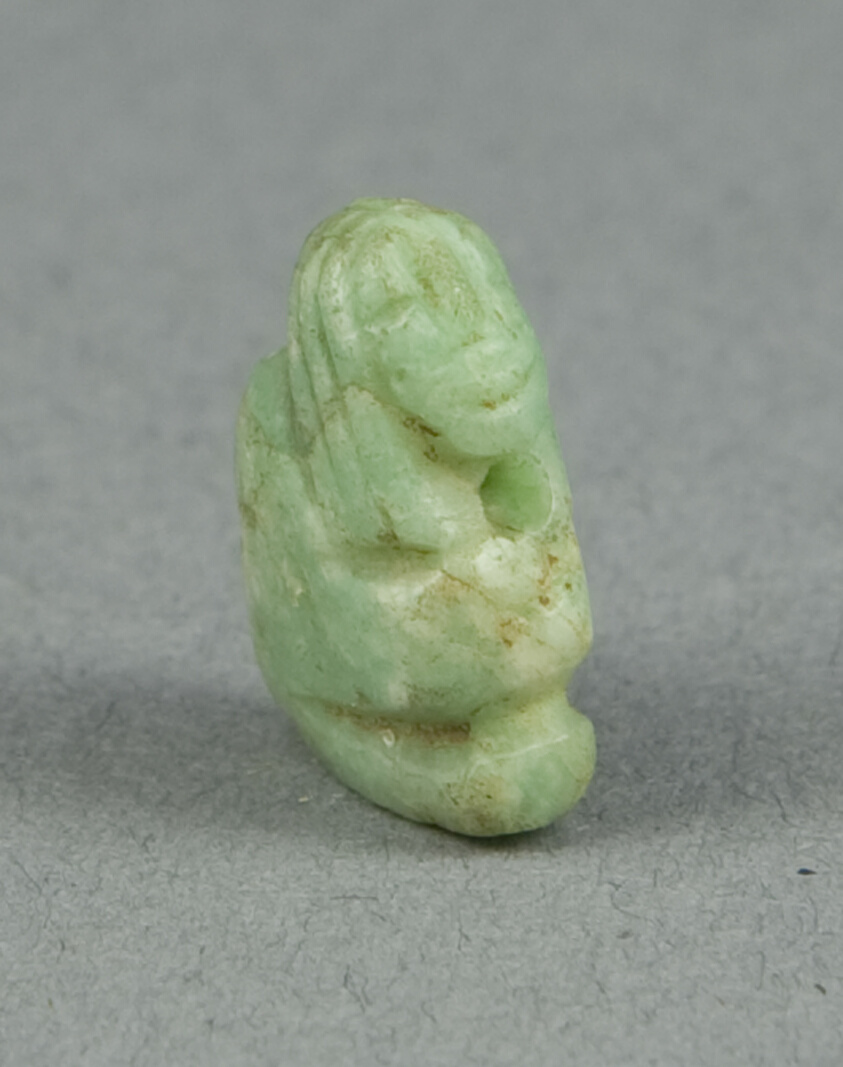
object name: Costume and Accessories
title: Amulet of a Crouched Female Sphinx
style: egyptian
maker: Egyptian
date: Middle Kingdom, Dynasty 11–13 (about 2055–1650 BCE)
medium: Green Feldspar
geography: Egypt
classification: amulet; jewelry; stone; ancient art; costume